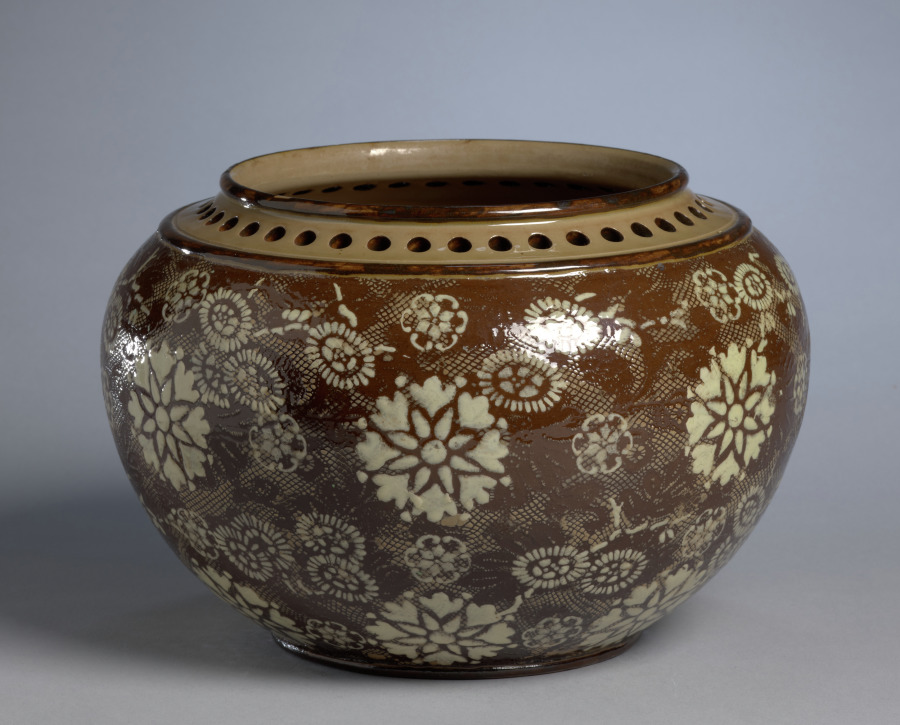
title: Bowl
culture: England, Lambeth, South London, 19th century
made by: Doulton Pottery and Porcelain Company (British)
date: c. 1885–1890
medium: stoneware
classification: Ceramic